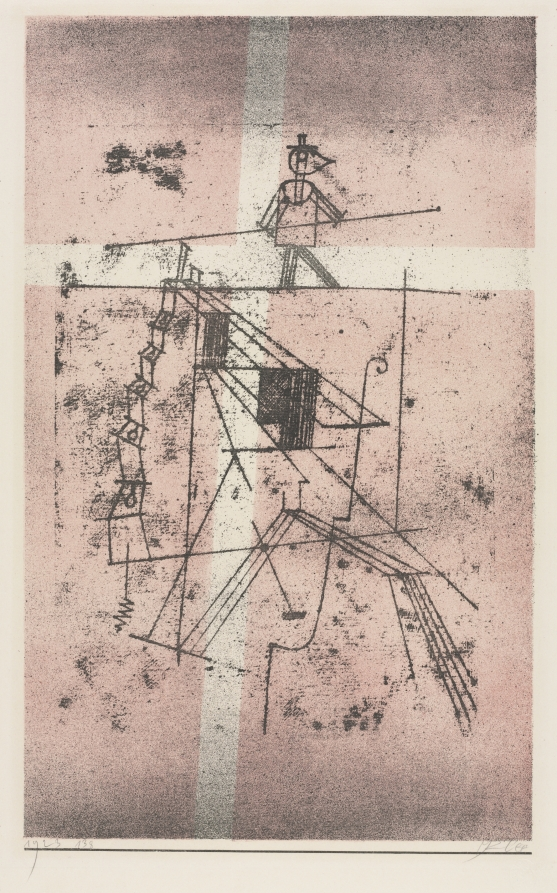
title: Tightrope Walker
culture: Germany, 20th century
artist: Paul Klee (German, 1879–1940)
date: 1923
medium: color lithograph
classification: Print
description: This lithograph is one of Paul Klee’s many depictions of tightrope walkers, a subject that he saw as reflecting the balance and tension necessary to artistic creation. Against a field of pink, the figure occupies only a small portion of the sheet, much of which is filled with an abstracted landscape of winding stairs and paths. Klee employed a variety of lithographic techniques in the print—from the fine pen lines used to sketch the tightrope walker and his surroundings to the smooth gradient above and below him, making him appear as if spotlit.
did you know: Paul Klee made this print during a decade spent on the faculty of the Bauhaus, an influential German art school.